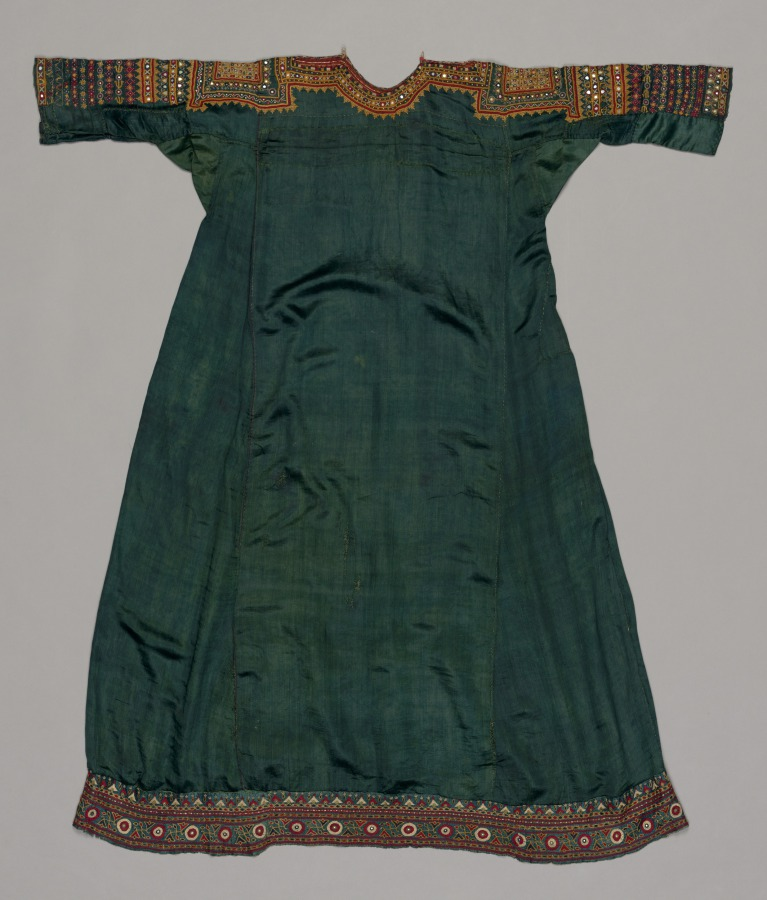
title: Woman's Dress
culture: Western India, Gujarat, Kachchh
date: 1800s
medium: silk thread on silk ground, embroidery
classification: Garment